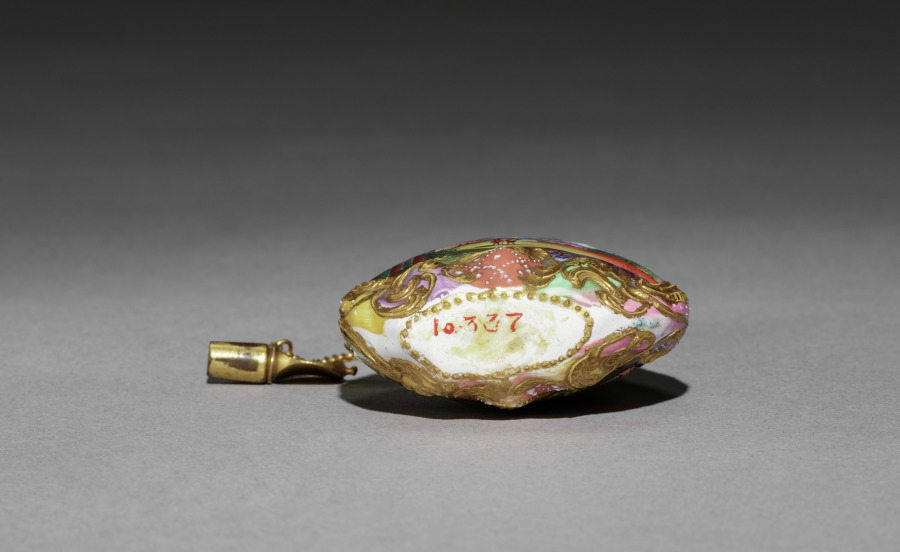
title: Scent Bottle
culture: England, Staffordshire, 18th century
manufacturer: Staffordshire Factory (British)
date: 1700s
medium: enamel on copper with metal mounts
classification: Miscellaneous